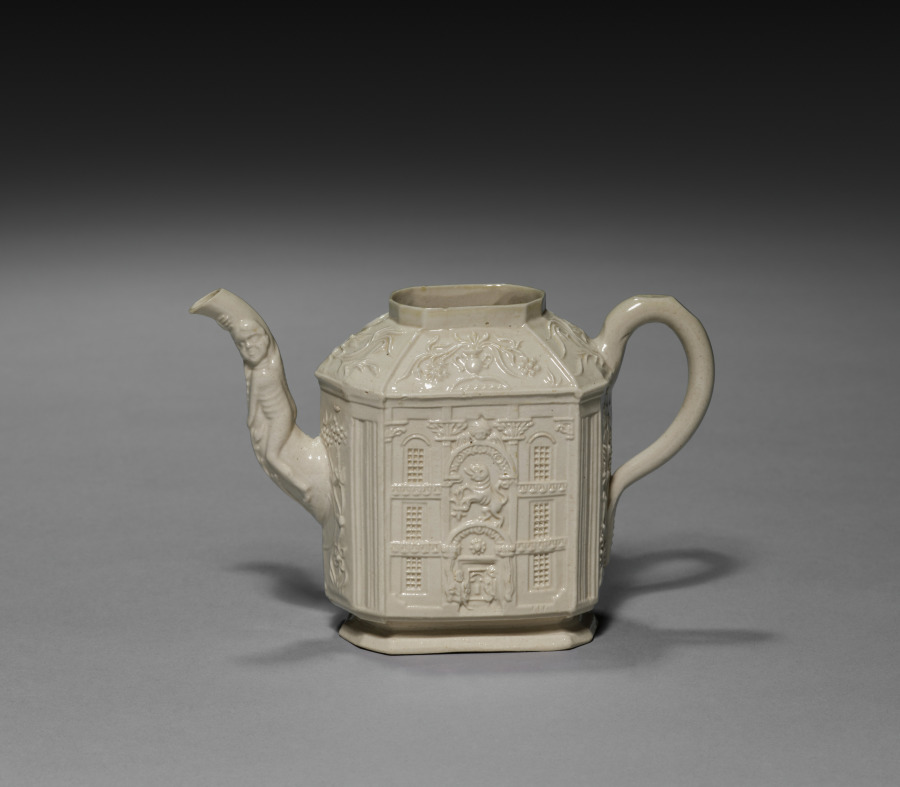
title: Teapot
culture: England, Staffordshire, 18th century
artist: Staffordshire Factory (British)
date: c. 1745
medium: salt-glaze earthenware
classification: Ceramic